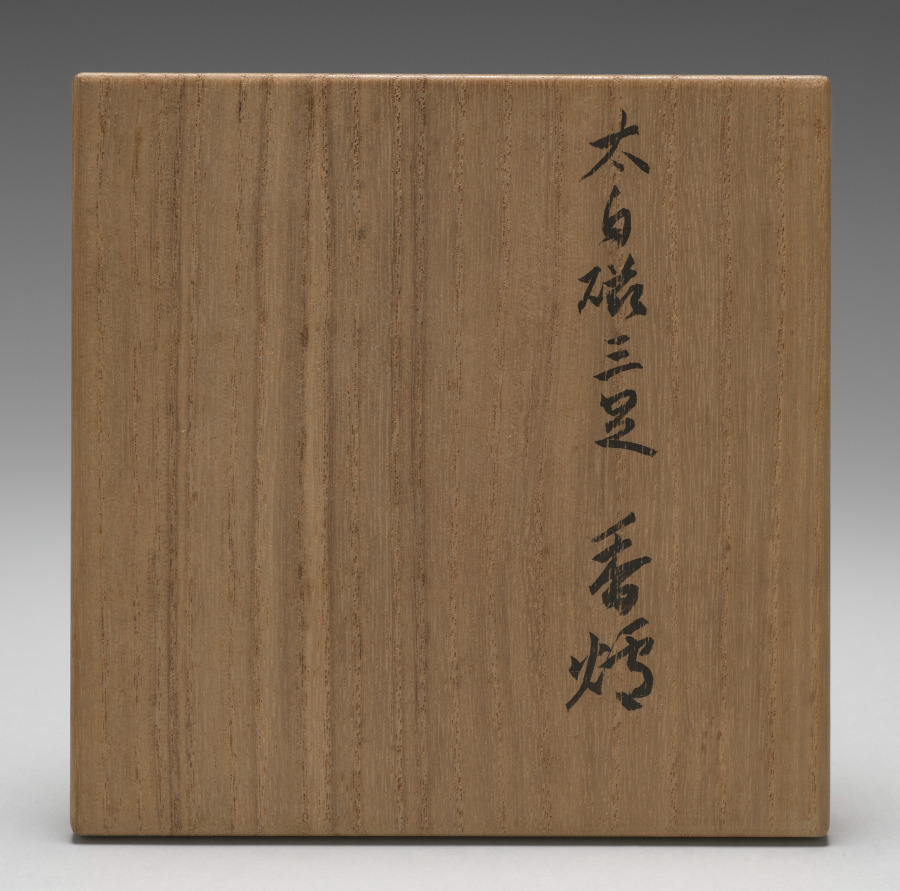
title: Incense Burner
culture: Japan, Meiji period (1868–1912)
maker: Seifū Yohei III (Japanese, 1851–1914)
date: 1893–1914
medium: Porcelain with creamy white glaze and molded design and floral openwork silver lid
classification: Ceramic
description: Yohei III made incense burners in a wide variety of designs and styles. The body and glaze of this one are taihakuji, or “great white porcelain,” an important early invention Yohei III devised in 1872. The burner has rounded, cabriole legs, resembling tiny table legs, attached to the exterior and the faintest decorative band around the bottom. Lids were produced outside the studio by metalwork specialists. For this incense burner, they created a floral-patterned silver lid.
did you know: This cylindrical incense burner has a distinctive translucent, creamy glaze over an ivory-colored clay body.